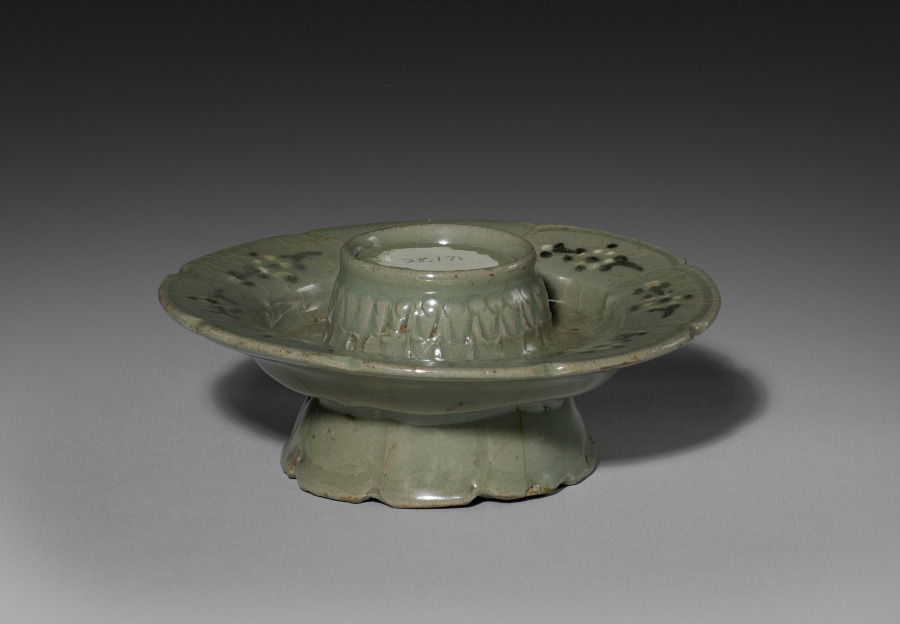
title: Saucer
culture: Korea, Goryeo dynasty (918–1392)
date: 1100s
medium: Celadon ware with inlaid white and black slip decoration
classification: Ceramic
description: This celadon wine cup is inlaid with a chrysanthemum pattern that reflects Koreans’ enjoyment of both the poem "Drinking Wine" and the blessings of longevity associated with the Double Nine Festival. The flower design on the saucer is less delicate than the cup, as the cup and saucer were originally from different sets; they were later paired together after each lost its mate.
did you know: Elites of the Goryeo period are known for their love of drinking tea and wine. This type of delicate-looking cup stand not only made their drinking experience more enjoyable, but also showed their refined taste.